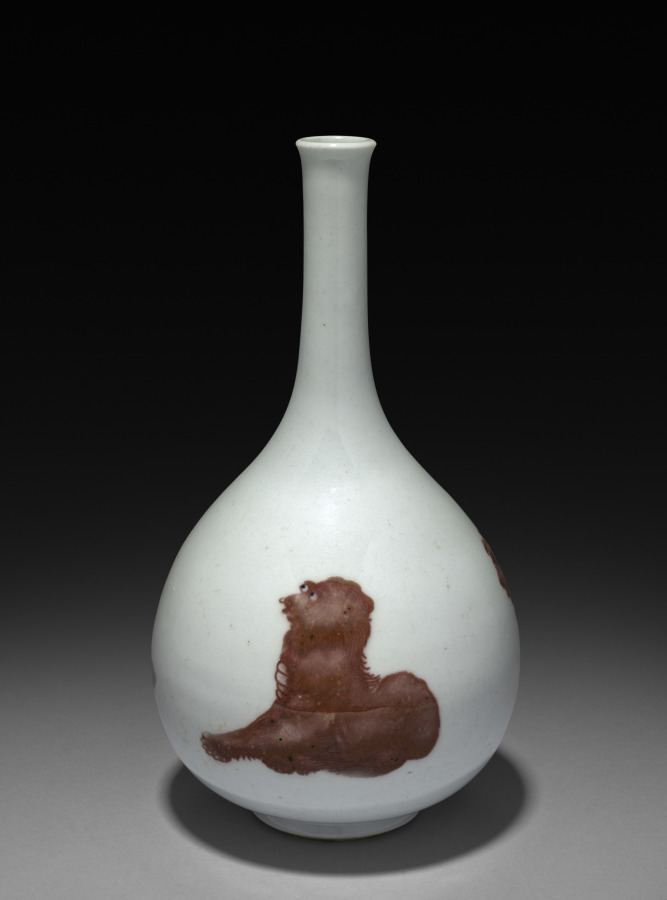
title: Bottle-shaped Vase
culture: China, Qing dynasty (1644-1911), Kangxi reign (1661-1722)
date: 1662–1722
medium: porcelain with underglaze decoration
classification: Ceramic